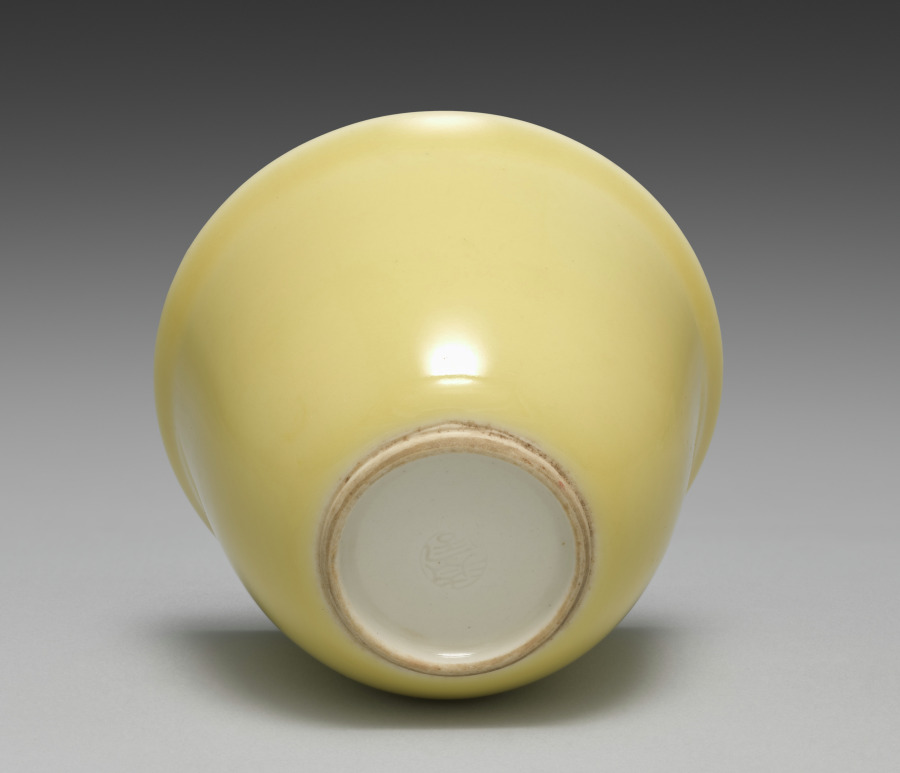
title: Cup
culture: Japan, Taishō period (1912–26) or Shōwa period (1926–89)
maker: Seifū Yohei IV (Japanese, 1872–1951)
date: 1914–46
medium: porcelain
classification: Ceramic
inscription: 清風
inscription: 清風造 【印】成山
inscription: 清風盧人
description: Like his father, Yohei IV also produced works with red or yellow monochrome glazes. His yellow-glazed works include this set of five drinking cups, a pair of sake pourers CMA 2022.216, and a sweets bowl molded into the shape of a chrysanthemum CMA 2022.218.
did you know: Seifū Yohei IV learned the ceramics industry from his father and painting from Tanomura Shosai.